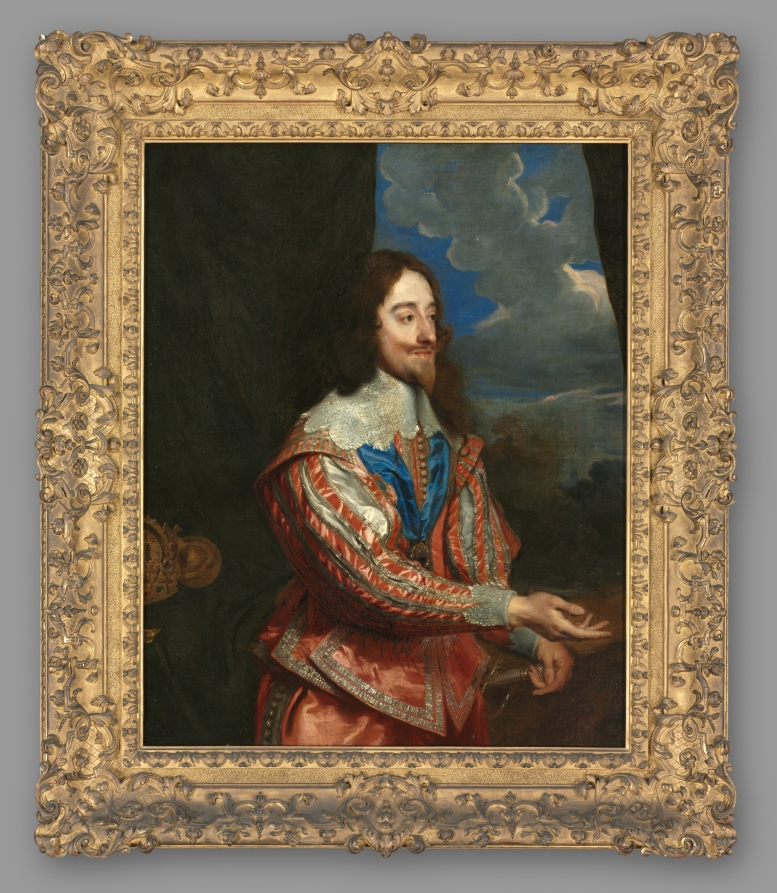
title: Portrait of Charles I (1600–1649)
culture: Flanders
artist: copy after Anthony van Dyck (Flemish, 1599–1641)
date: 1600s or later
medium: oil on canvas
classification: Painting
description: This is a fragment of a copy of van Dyck's portrait of 1632. Originally a double portrait, the painting would have included Charles I's wife, Queen Henrietta-Maria. An avid art collector, Charles I lured many important artists, including van Dyck and Rubens, from the Continent to England. Charles I was beheaded in 1649; however, the monarchy was later restored in 1660 by his son, Charles II.